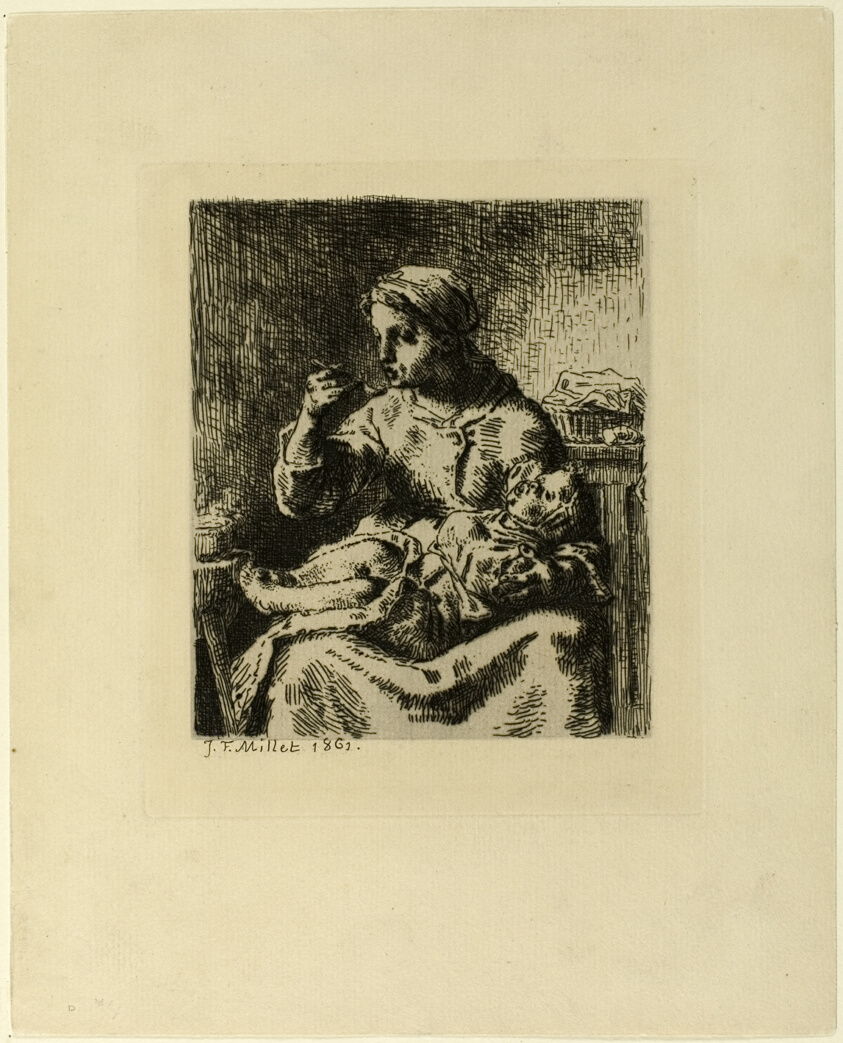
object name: Print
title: Woman Feeding Her Child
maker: Jean François Millet (French, 1814-1875); printed by Auguste Delâtre (French, 1822-1907); Félix Henri Bracquemond (French, 1833-1914)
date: 1861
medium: Etching and drypoint on cream laid paper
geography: France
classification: etching; print; prints and drawing